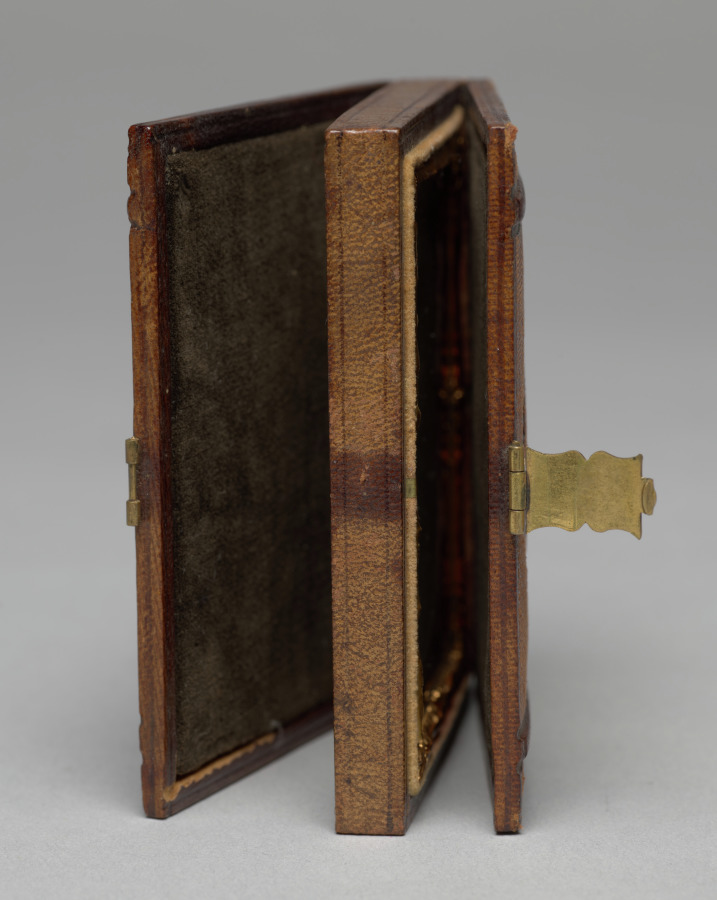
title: Seated boy in tasseled cap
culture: America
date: c. 1858–61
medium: ambrotype, sixth plate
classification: Photograph